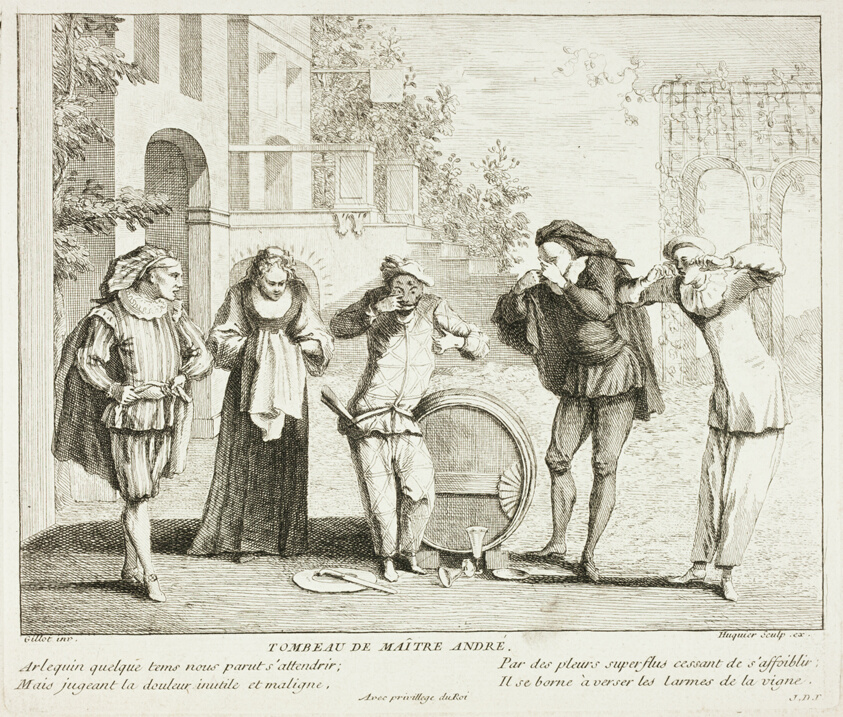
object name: Print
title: Plate from Livre de Scènes Comiques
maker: Gabriel Huquier (French, 1695-1772); after Claude Gillot (French, 1673-1722)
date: 1729/32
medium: Etching on paper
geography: France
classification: etching; print; prints and drawing